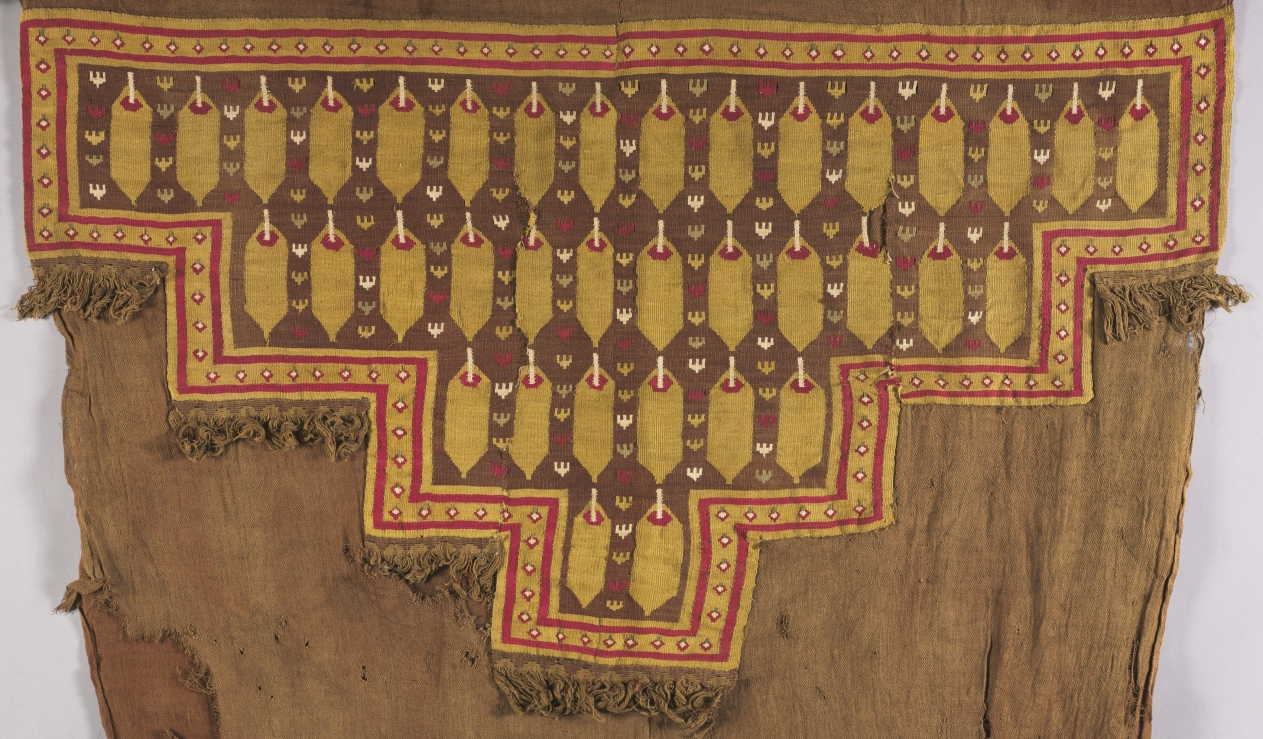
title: Loincloth with Feather(?) Motifs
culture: Peru, Central Andes, Chimú or Chimú-Inka, 11th-16th century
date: 1000–1532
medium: plain weave, tapestry weave; cotton, camelid fiber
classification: Textile